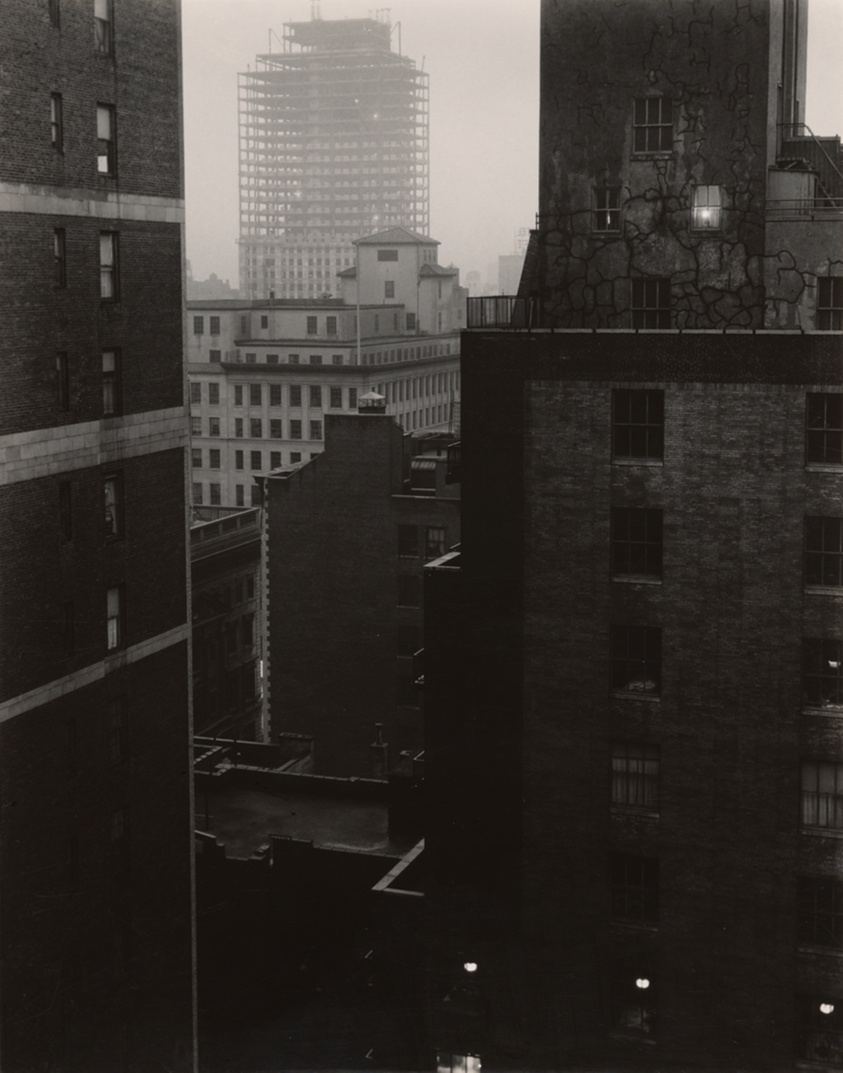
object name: Photograph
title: From My Window at An American Place, Southwest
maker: Alfred Stieglitz (American, 1864–1946)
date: 1932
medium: Gelatin silver print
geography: United States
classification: gelatin silver (developing-out-paper) pr; photographic process; photography; photograph